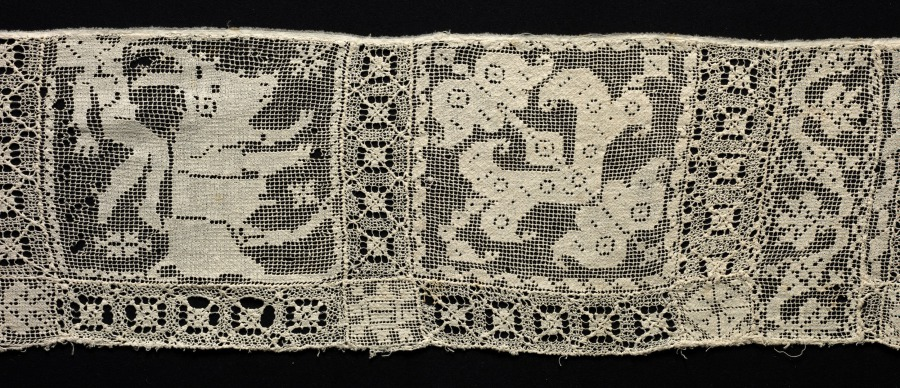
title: Band with Various Fantastic Creatures and Vegetal Patterns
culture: Italy, 1800s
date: 1800s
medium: Bleached linen (est.): needle lace, filet/lacis (knotted ground and darned in two directions)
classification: Lace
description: The reversed and backward orientation of many of the squares in this band of lace suggests that this was not their original layout. They were most likely taken apart and later joined back together in a disoriented manner.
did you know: The square showing a man in midair above a bull-like creature is reminiscent of the Minoan "Bull Leaping" fresco at the Knossos palace complex.